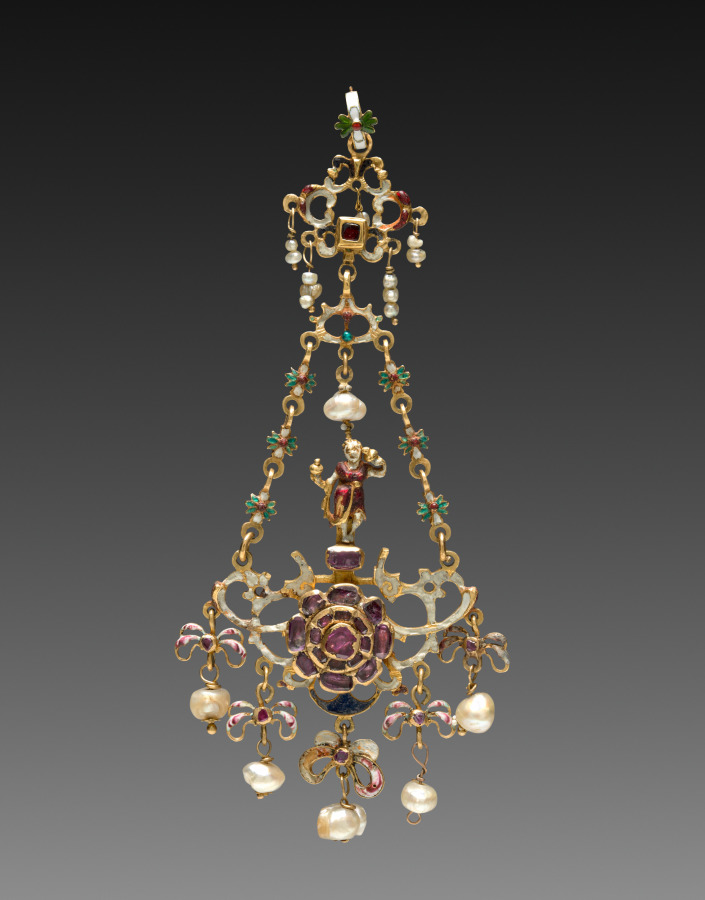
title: Pendant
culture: Italy, 17th century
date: 1600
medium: gold, enamel, pearls, rubies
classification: Jewelry